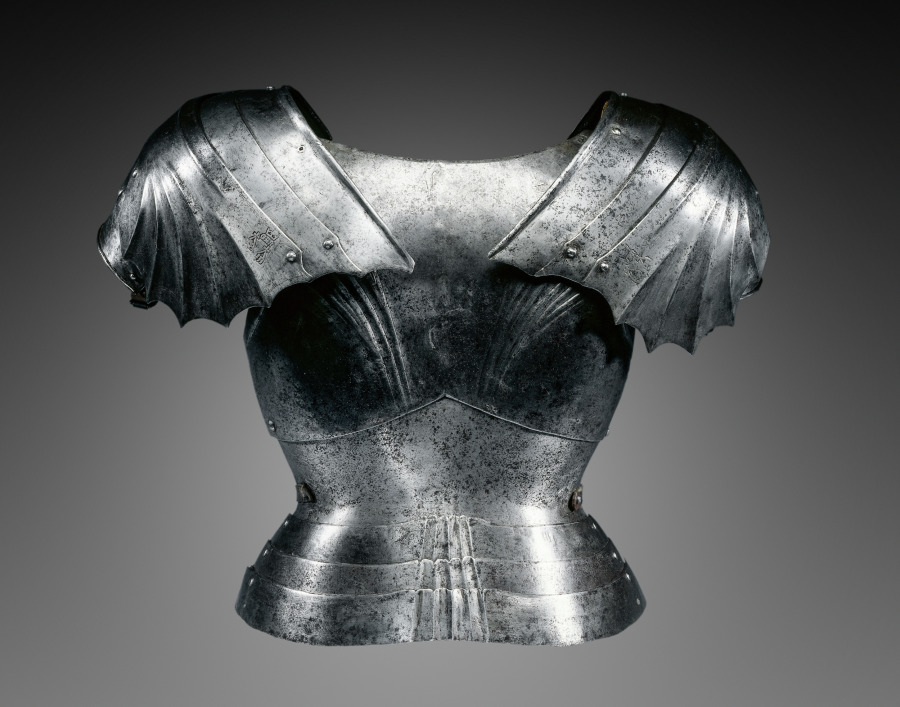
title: Gothic Backplate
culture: Germany, late 15th Century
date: c. 1475–1500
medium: steel, modern leather straps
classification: Arms and Armor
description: Over time the increasing effectiveness of the crossbow and longbow made steel plates necessary for protection. Around 1400 a knight was protected almost entirely by plate armor. The elements shown here (backplate and fan-shaped pauldrons), with their sculptural line, illustrate the beauty of plate armor from the Gothic age.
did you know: This armor would have been polished mirror bright and been a spectacular sight in the sunlight.